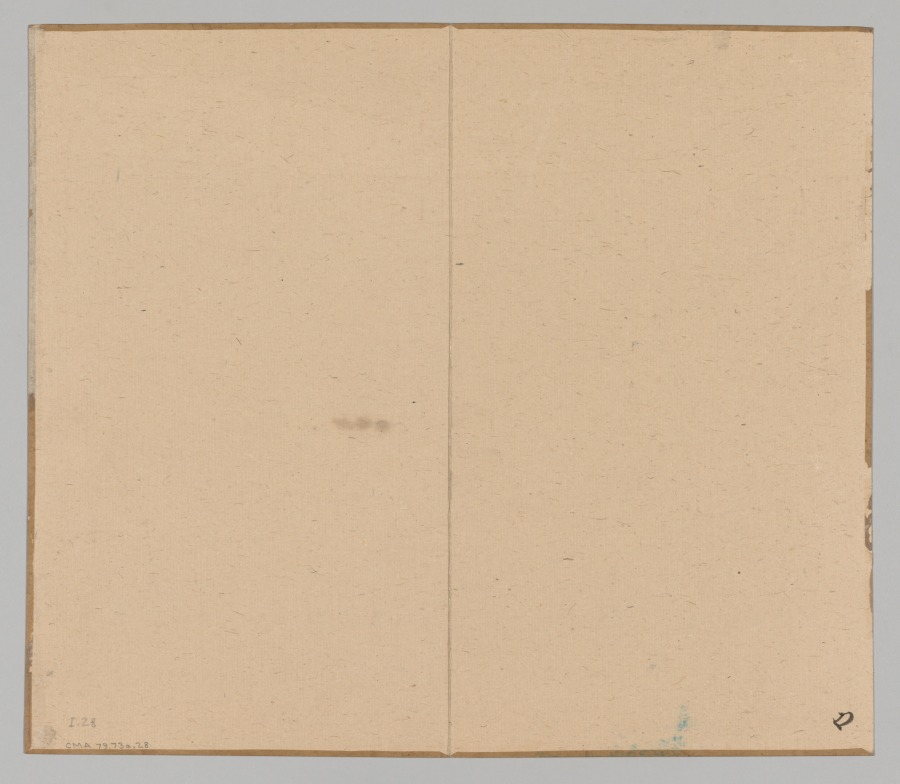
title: Reverberations of Taiga, Volume 1 (leaf 28)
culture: Japan, Edo period (1615–1868)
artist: Aoki Shukuya (Japanese, d. 1802)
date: mid- to late 1700s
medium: double-leaf from a pair of albums; ink and light color on paper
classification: Portfolio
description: Traditionally, young painters in Japan began their studies with an established master-painter. The master's compositions invariably became models that the apprentice copied to learn various ink and brush techniques. Shukuya was a pupil of the famous Kyoto artist Ikeno Taiga, whose style is reflected in these sketches of rocks, trees, and mountains.